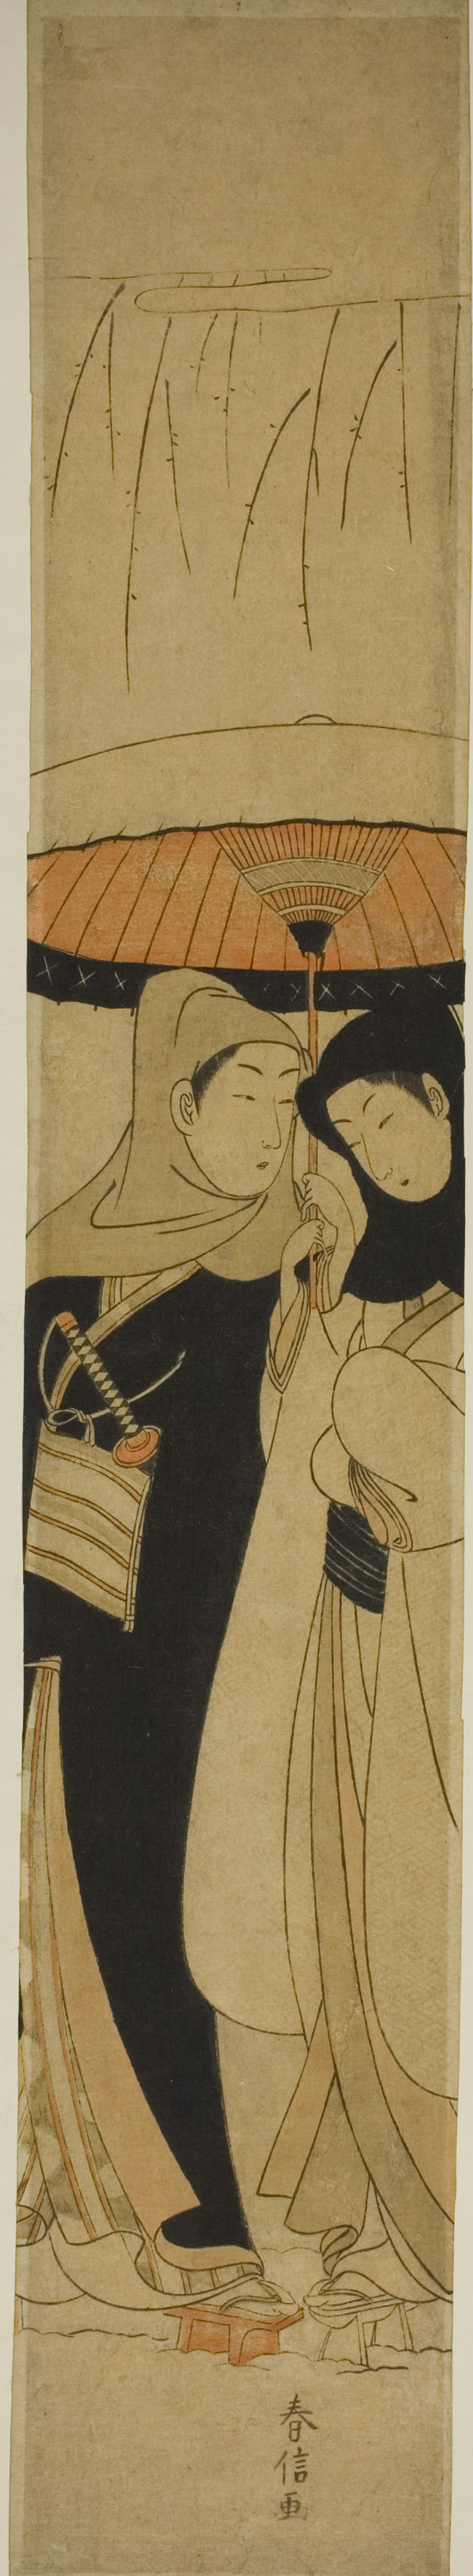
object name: Print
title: Lovers under an Umbrella in the Snow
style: Japanese (culture or style)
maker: Suzuki Harunobu 鈴木 春信; Japanese, 1725 (?)-1770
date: c. 1767/68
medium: Color woodblock print; hashira-e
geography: Japan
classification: woodblock print; print; asian art